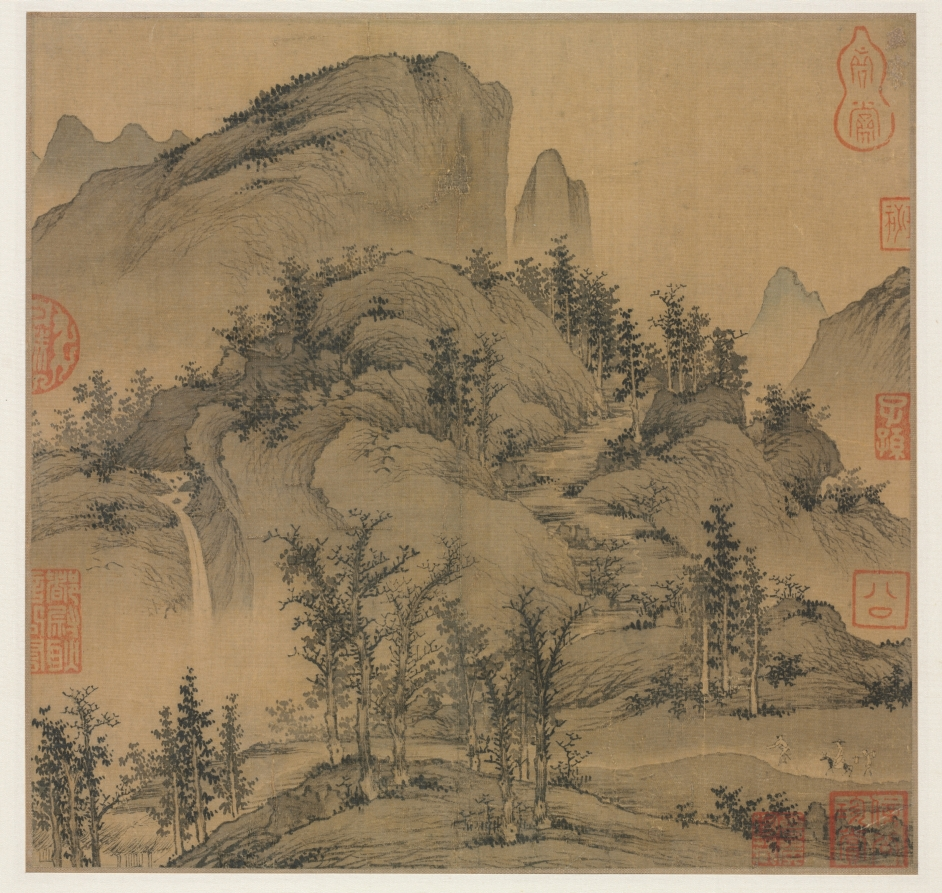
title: Travelers in Autumn Mountains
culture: China, Yuan dynasty (1271-1368)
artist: Sheng Mou (Chinese, active c. 1310–1350)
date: 1300–50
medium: album leaf; ink and slight color on silk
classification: Painting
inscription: 盛 ?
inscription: 10 collectors' seals: 8 of Geng Zhaozhong 耿昭忠 (1640-1686); 2 of Geng Jiazuo 耿嘉祚 (late 1600s-early 1700s), son of Geng Zhaozhong.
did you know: Most of the signature of the artist has been scraped away, so that only the character "Sheng" is legible.